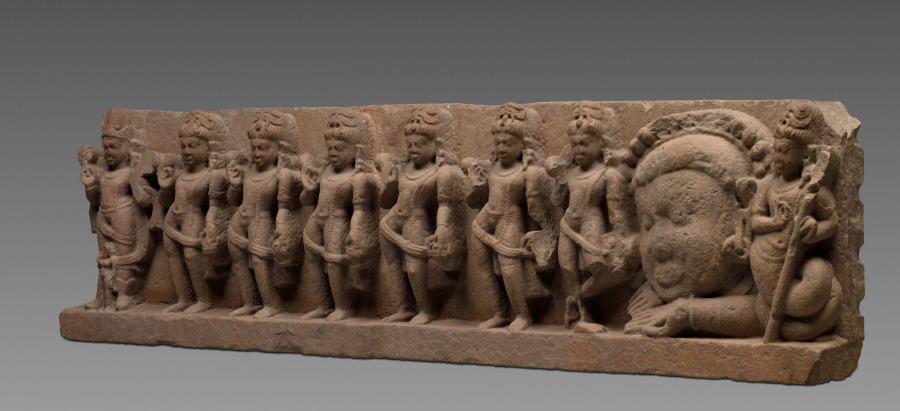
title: Nine Celestial Bodies (Navagraha)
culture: Central India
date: 700s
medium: Sandstone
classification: Sculpture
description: Near temple entrances, the nine celestial bodies were depicted in an orderly row, often in figural form. From left to right they are: Sun with a tall crown and the female Dawn in front of him. The next five figures are nearly identical: Moon, Mercury, Venus, Mars, and Jupiter. As a portent of doom, Saturn was wounded by a goddess to prevent him from moving swiftly, so he stands on one leg. The bodiless head is Rahu, the eclipse, who swallows the moon until it falls out his neck. The serpent-tailed figure is a comet.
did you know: The Sun (Surya) is the only figure who wears boots and holds fully open lotus flowers.